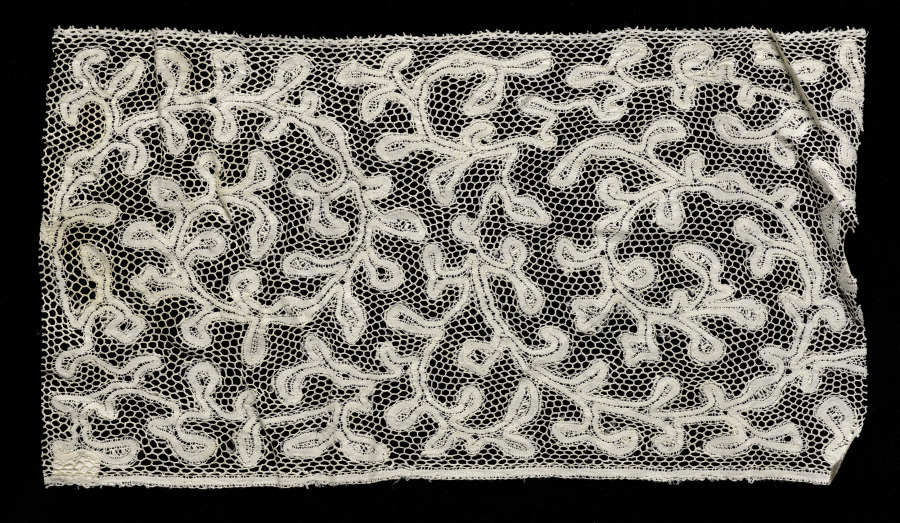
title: Lace Edging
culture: Italy, Milan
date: 1700s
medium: Linen: bobbin lace (mesh ground)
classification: Lace